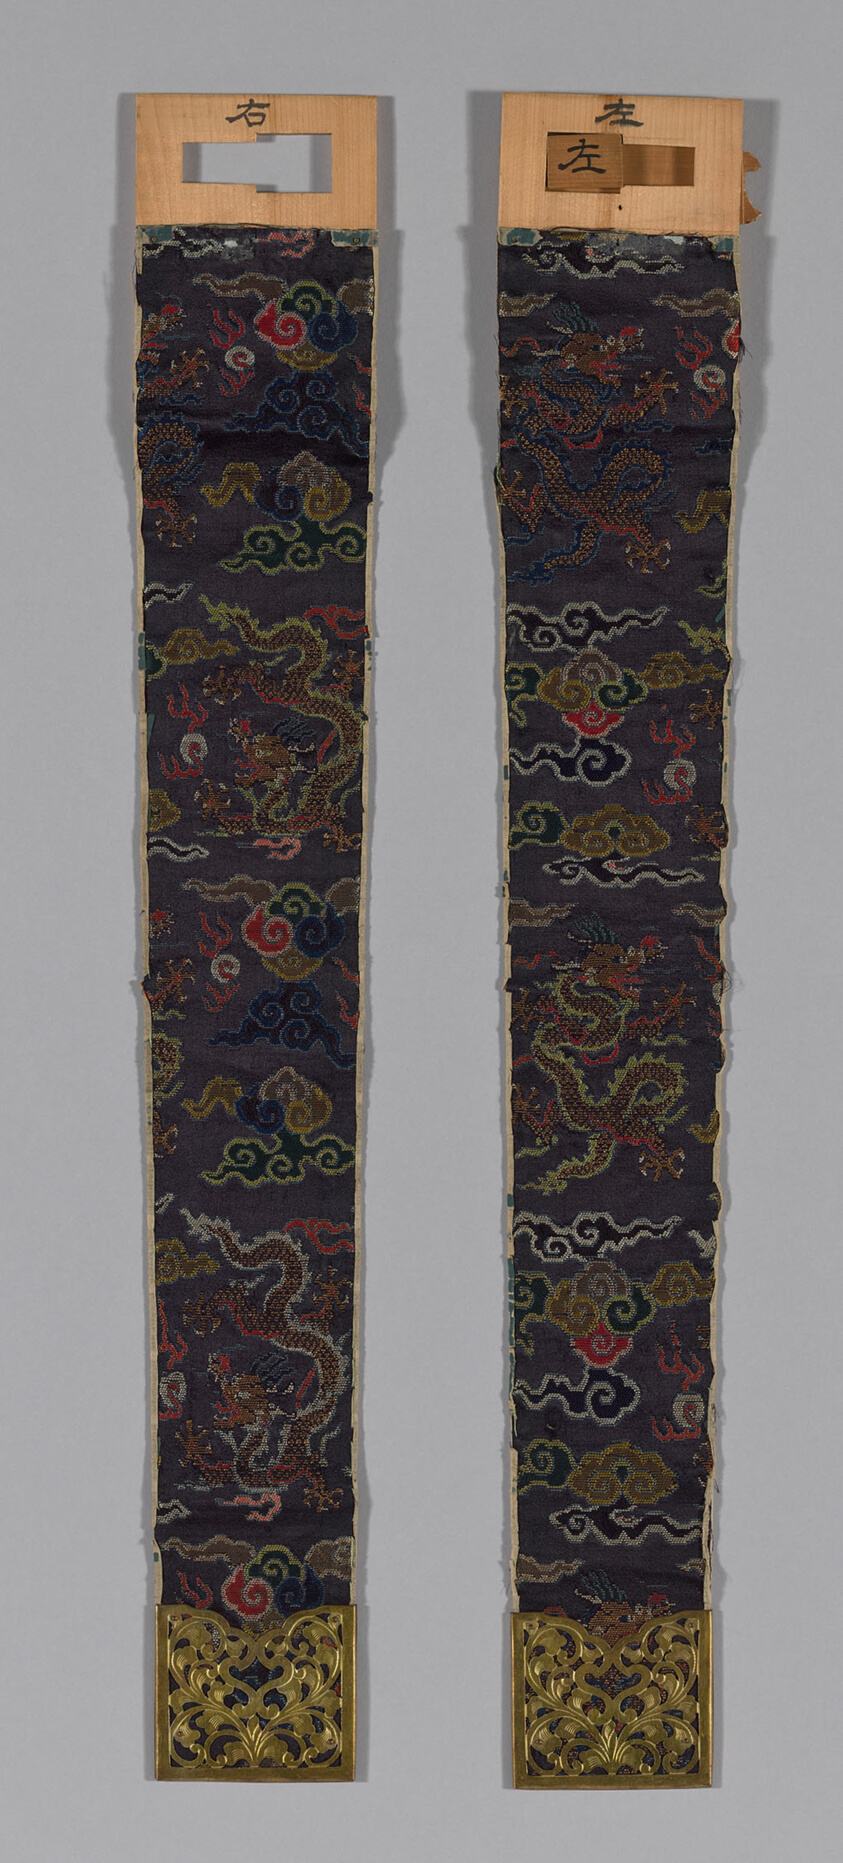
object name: Textile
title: Pendant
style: Japanism, meiji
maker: Japan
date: 1870/90, Meiji period (1868–1912)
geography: Japan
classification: textile; liturgical - buddhist; weaving